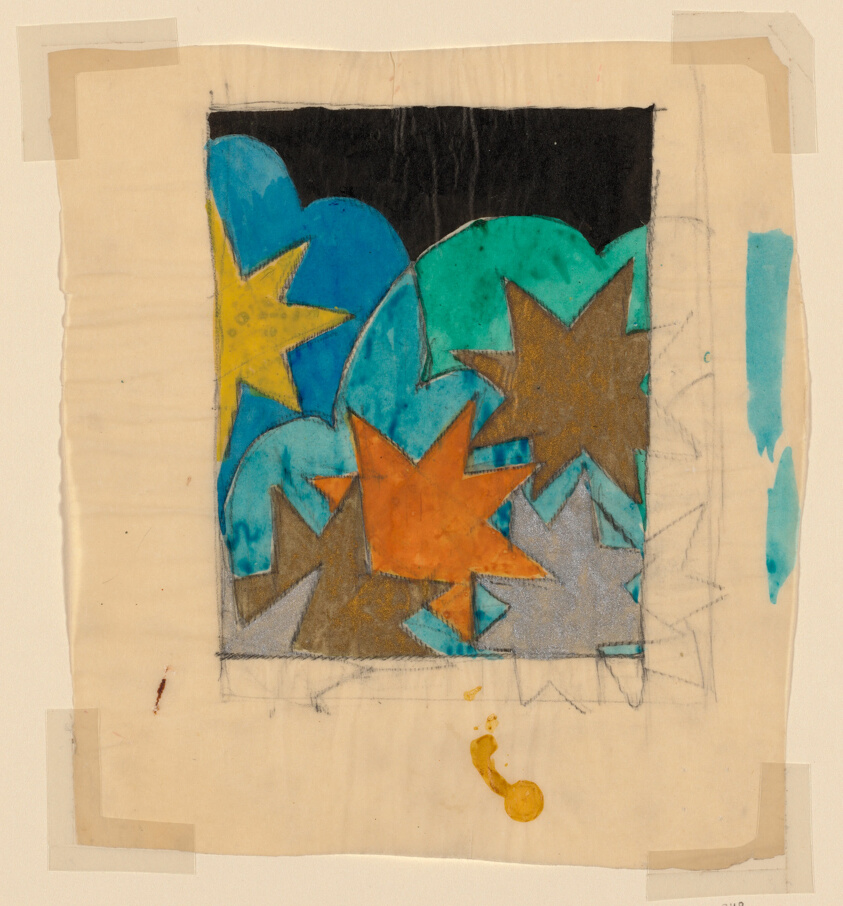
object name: Drawing and Watercolor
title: Design for a Textile or Wallpaper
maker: Possibly Austria, Vienna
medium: Graphite and paint; on paper; painted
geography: Vienna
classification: textile; accessory - paper design